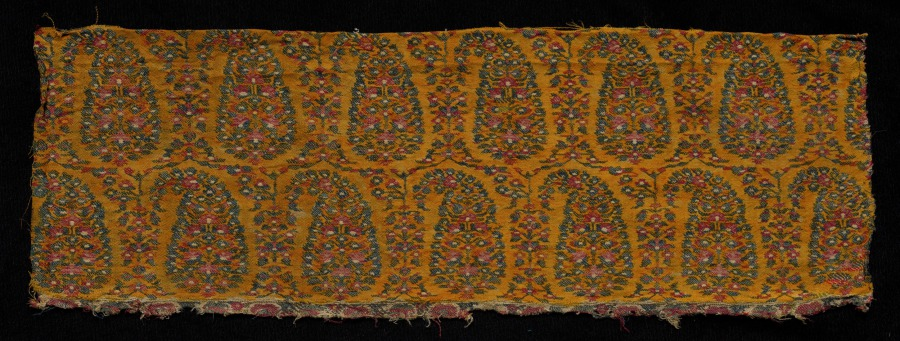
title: Fragment of a Shawl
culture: India, Kashmir, 19th century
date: 1800s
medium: tapestry weave: wool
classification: Textile